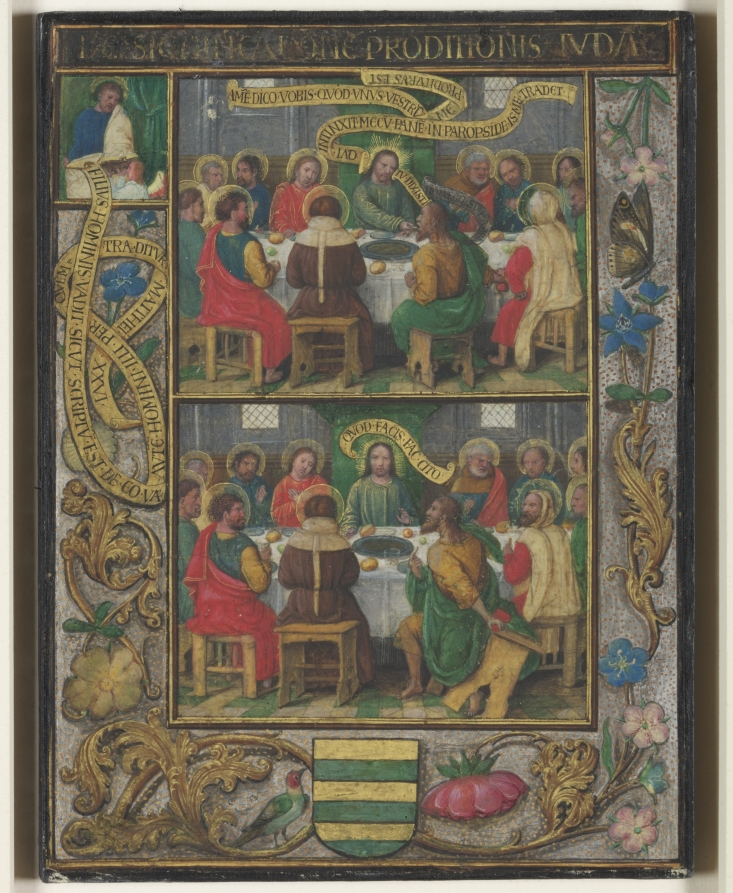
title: Single Leaf with Scenes from the Last Supper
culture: Flanders, Bruges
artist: Simon Bening (Flemish, 1483–1561)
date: c.1525–30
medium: tempera with liquid gold and silver on vellum, mounted on old wood board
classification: Manuscript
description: Born either in Ghent or Antwerp in 1483, Simon Bening became one of the most famous manuscript painters of the 1500s. He was the son of the miniaturist Alexander Bening. His long career in Bruges, where he worked from 1508 until 1555, was distinguished by a series of major commissions for celebrated families. This illuminated leaf, one of 11 preserved from the now lost parent manuscript, was painted for a member of the important Spanish family of Enriquez de Ribera, whose coat of arms appears at the bottom of the miniature. The incident, shown in the upper register, during which Jesus gives a piece of bread to Judas (dressed in yellow and green) to indicate his knowledge of his betrayal, is depicted primarily according to the Gospel of John (13:21–30). In the lower register, Judas, realizing that his betrayal is understood, gets up suddenly to leave. His wooden stool topples over, and Christ’s words appear in a banderole: Quod facis fac cito ("What thou doest, do quickly," John 13:27). The two scenes are surrounded by an illusionistic border in liquid silver, with liquid gold acanthus, butterflies, and flowers. In the upper left of the border is the evangelist Matthew.